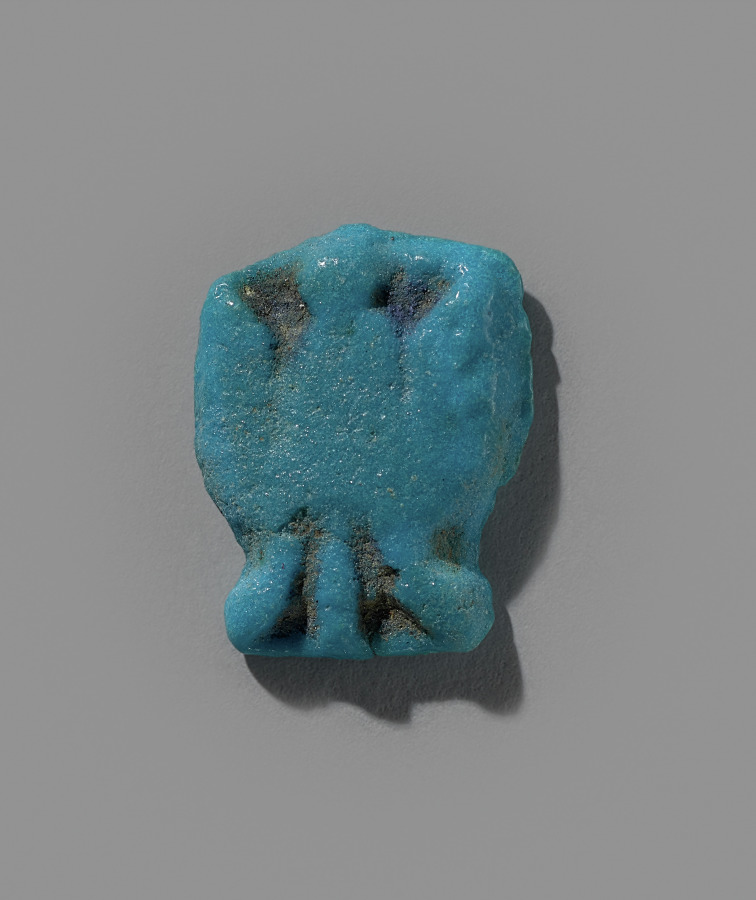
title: Food Model Amulet: Brace of Duck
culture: Egypt, New Kingdom (1540–1069 BCE), Dynasties 19–20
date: 1295–1069 BCE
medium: faience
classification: Amulets